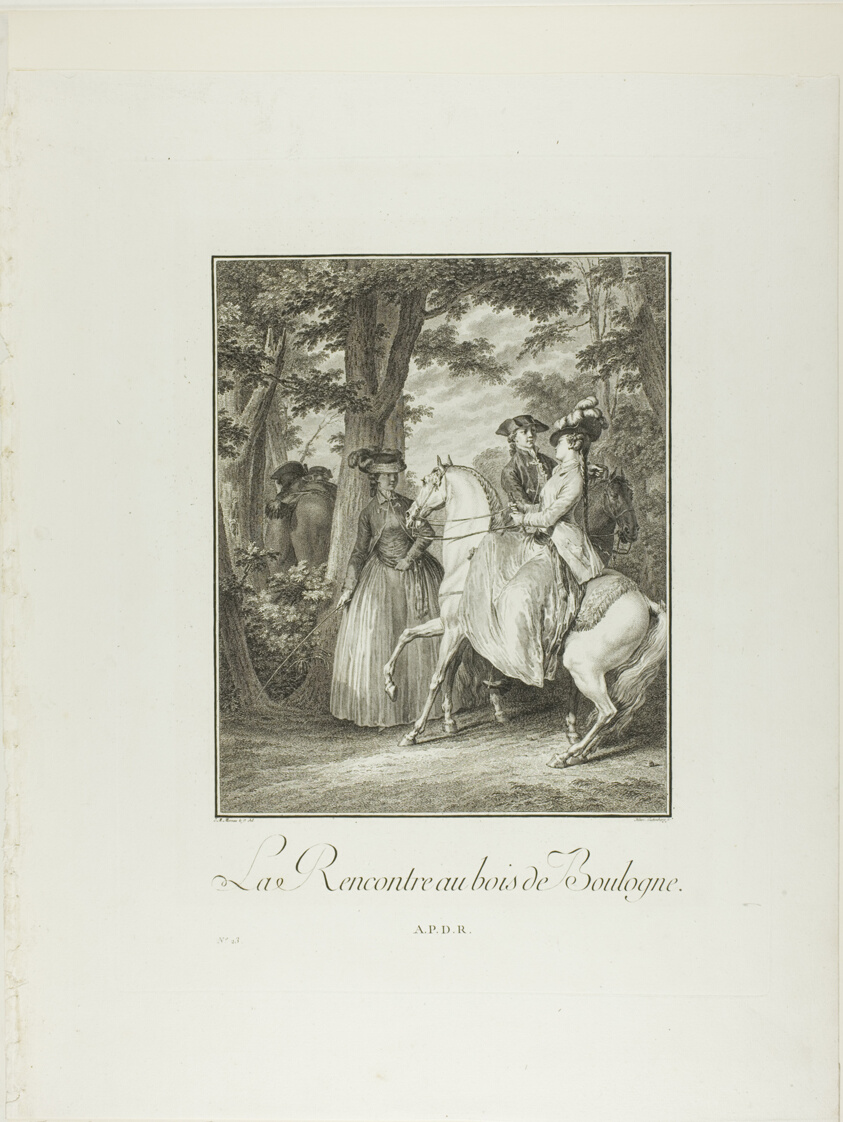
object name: Print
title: Meeting in the Woods of Boulogne, from Monument du Costume Physique et Moral de la fin du Dix-huitième siècle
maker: Heinrich Guttenberg (German, 1749-1818); after Jean Michel Moreau (French, 1741-1814); published by Laurent-François Prault (French 1712-1780)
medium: Engraving on paper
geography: Germany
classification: etching; print; prints and drawing